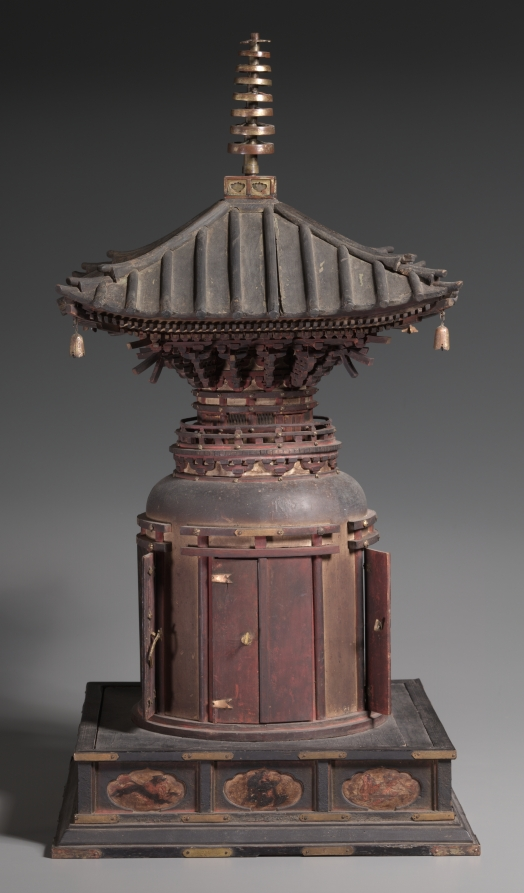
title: Many-Jeweled Stupa Reliquary (Tahōtō shari yōki)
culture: Japan, Kamakura period (1185–1333)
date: early to mid-1300s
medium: wood and metal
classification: Sculpture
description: Earthen mounds that marked the sites of interred relics in ancient India are called stupas. As Buddhism traveled through East Asia, the mounds took on the form of towers called “pagodas” by Westerners. This miniature tower, painted with Buddhist deities on the interiors of the doors on each side, likely once held items considered to be sacred relics. The deities on the doors have been tentatively identified as the four bodhisattvas of the sacred text the Lotus Sutra, and two Guardian Kings known as Niō.